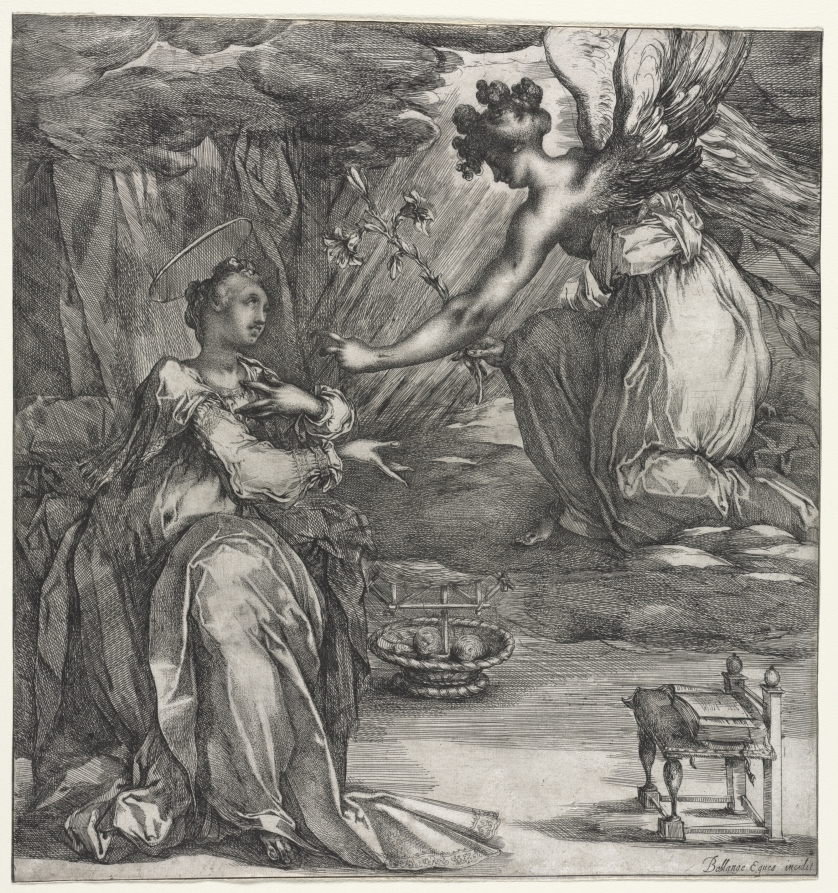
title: The Annunciation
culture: France, 17th century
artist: Jacques Bellange (French, c. 1575–1616)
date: c. 1613–16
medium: etching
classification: Print